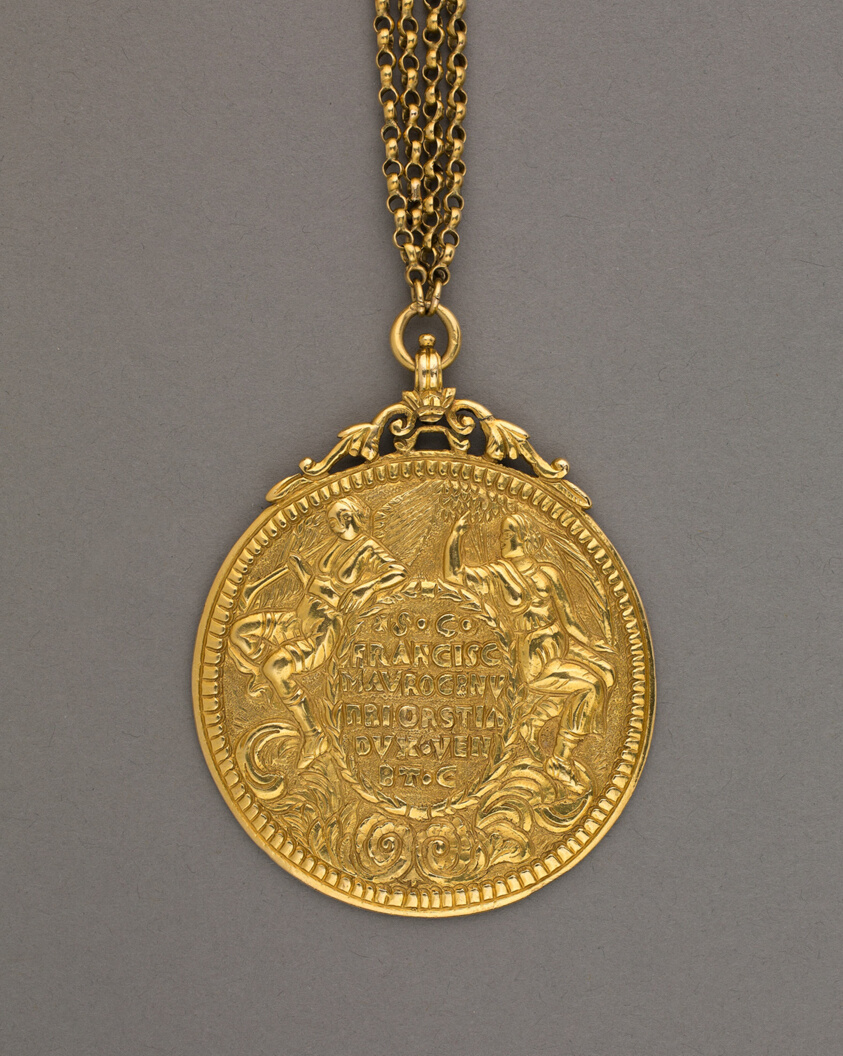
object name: Costume and Accessories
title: Presentation Medal of Francesco Morosini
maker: Italian, Venice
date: 17th century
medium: Gold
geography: Venice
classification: jewelry; european decorative arts; costume